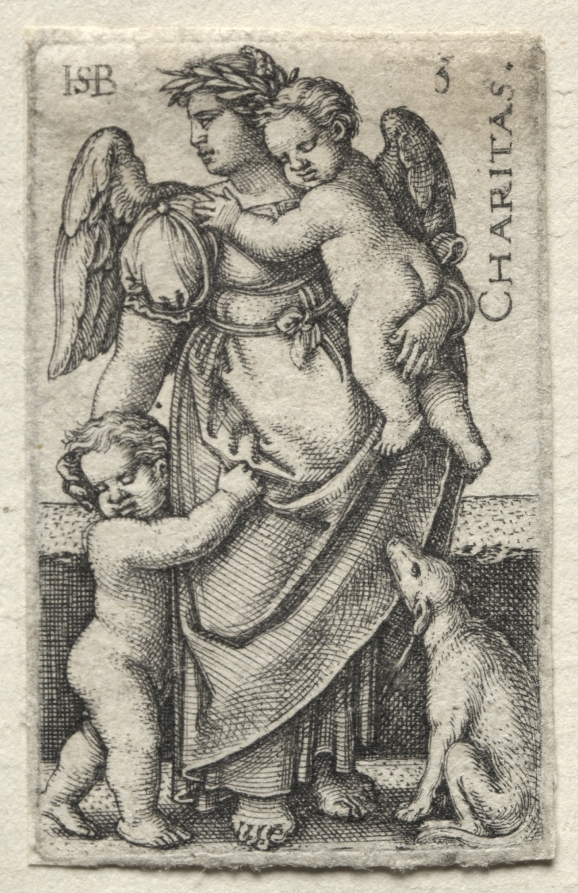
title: The Knowledge of God and the Seven Cardinal Virtues: Charity - Charitas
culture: Germany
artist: Hans Sebald Beham (German, 1500–1550)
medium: engraving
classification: Print